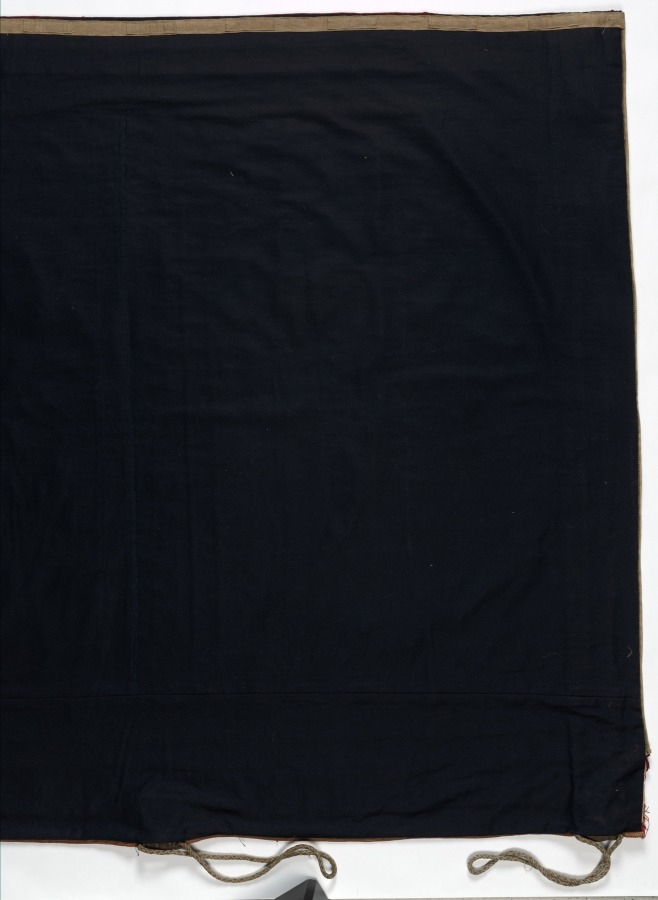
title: Royal Round Tent made for Muhammad Shah (wall panel with three design units)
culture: Iran, Rasht, Qajar period (1779-1925)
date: 1834–48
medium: Interior: wool: plain weave, inlaid work; silk: embroidery, chain stitch; tape, leather; Exterior: cotton, wool: plain weave; rope, iron ring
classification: Textile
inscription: Inscriptions: The central design unit of this wall panel has two embroidered inscriptions. 1. Upper inscription (center of the top blossom): "Muhammad shah sultan-e ghazi."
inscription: 2. Lower inscription (on the base of the vase): "Kamtarin bandeh-ye dargah fath'ali."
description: Royal tents were potent symbols of authority, wealth, and power throughout the greater Middle East. Rulers owned thousands of tents. They were used for shelter, shade, and innumerable functions in tent compounds that were essential for imperial ceremonies, travel, and military campaigns. Distinguished by size with elaborately decorated interior walls and ceilings, tents could be as large as castles. Opulent tents were also presented as imperial gifts. Tents are only known through documents before 1600. For example, in Baghdad in 809, Caliph Harun al-Rashid owned 4,000 ceremonial tents and 150,000 camping tents that were stored in the imperial Abbasid treasury. An astonishing variety and quantity of tents were housed in the royal Fatimid tent storeroom in Cairo in 1068-69, including "military tents, fortress tents, and castle tents, manufactured of . . . gold-brocaded stuff embroidered with designs of elephants, wild beasts, horses, peacocks, birds." Since 1600, Ottoman Turkish tents with elaborate floral decoration have been preserved in Istanbul in the Topkapi Palace Museum and Military Museum, and in European collections as war booty, primarily from the Ottoman Turks' attempt to conquer Vienna in 1683. These tents are not done in the Rasht technique, but rather are applique. In contrast, royal tents from Iran are extremely rare. This spectacular ceremonial tent is embroidered with the name of its owner, Muhammad Shah, who ruled Iran from 1834 to 1848 during the Qajar dynasty. The radiant jewellike interior features exuberant flora, blossoming vines, and robust birds made with colored wool embellished with silk-thread embroidery.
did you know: Rasht work is named after the city on the Caspian Sea in present-day Iran, which was a major silk trade center with numerous textile workshops.